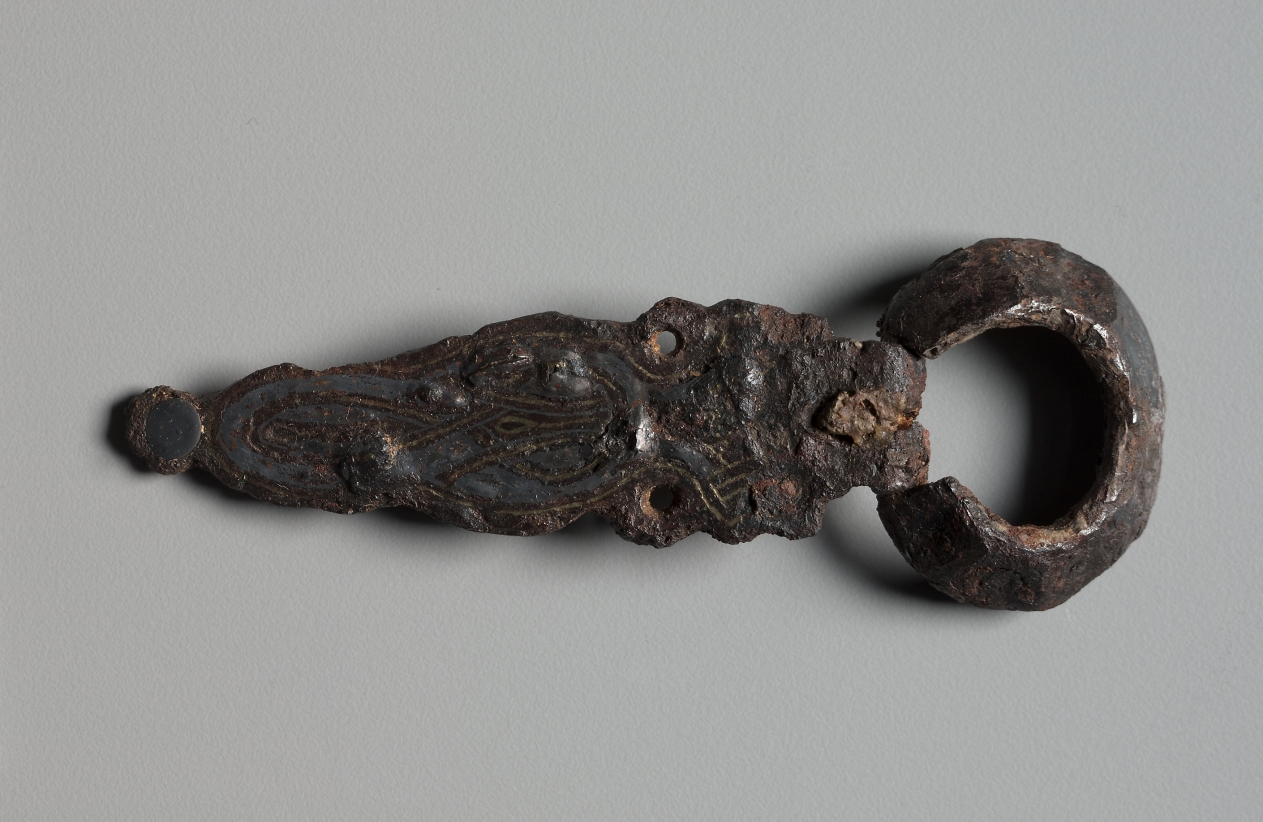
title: Buckles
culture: Merovingian, Burgundian, Migration period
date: 600s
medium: iron with gold and silver overlay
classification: Jewelry